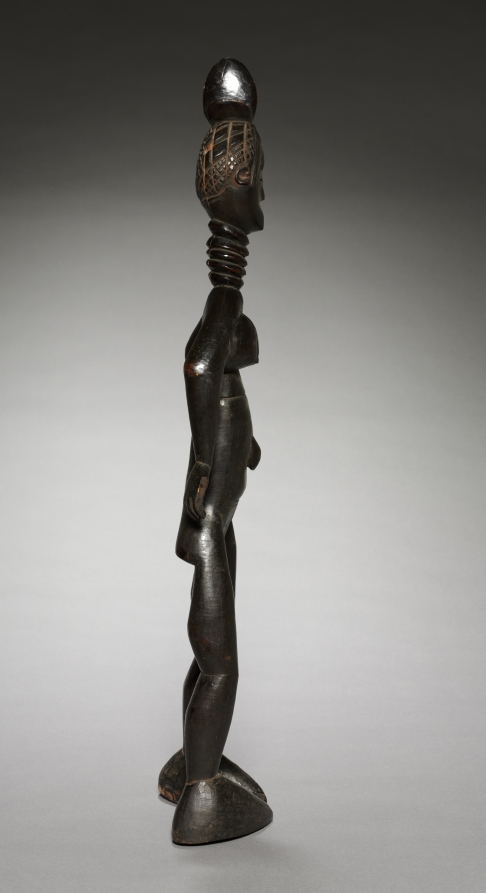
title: Female Figure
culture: Africa, West Africa, Sierra Leone, Mende or Bullom style, unknown maker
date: early 1900s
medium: wood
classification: Sculpture